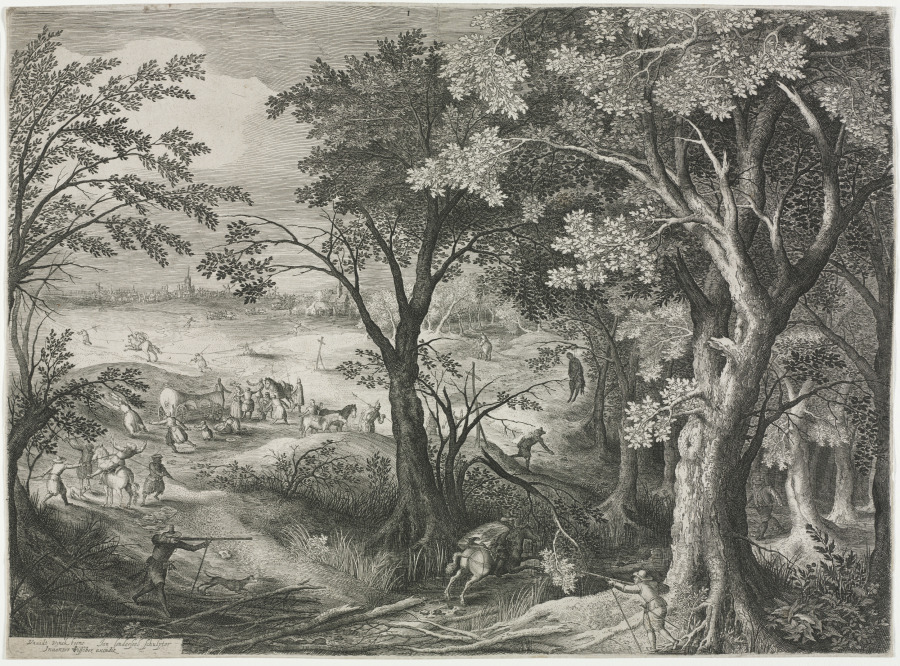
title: Landscape with Travelers Attacked by a Gang of Robbers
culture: Netherlands, early 17th Century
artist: Jan van Londerseel (Dutch, 1578–1625)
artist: after David Vinckboons (Dutch, 1576–1629)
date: 1602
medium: engraving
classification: Print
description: The subject of waylaid travelers was a popular motif for Netherlandish artists, especially around 1600. As a consequence of the war with Spain, displaced mercenaries and army deserters occasionally formed bands of robbers and victimized travelers and rural inhabitants. In this engraving after a drawing by David Vinckboons, a variety of incidents take place at the edge of a dark forest interior. As women and children flee their captured wagon, two bandits aim their guns at another traveler escaping on horseback. The ominous silhouette of a dead man hangs from a tree warning the viewer of possible perils encountered in the forest. Like Coninxloo, Flemish painter David Vinckboons left Antwerp after 1585 and settled in Amsterdam in 1586.